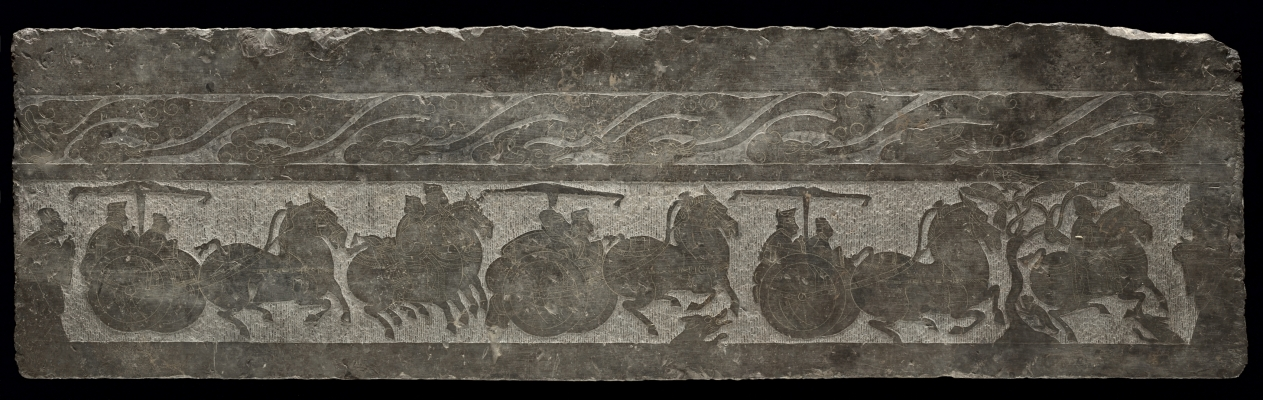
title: Frieze Fragment with Chariot Procession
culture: China, style of Wu Family Shrines, Jiaxiang district, Shandong province, Eastern Han dynasty (25–220 CE)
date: 100s CE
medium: stone carved in low relief with engraved detail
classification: Sculpture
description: The frieze shows a procession of horse-drawn chariots passing through terrain animated with wild animals and a monkey climbing a tree. The border of swirling clouds above conveys associations with heaven or the remote land of immortals in the high mountains. Comparable in style with the stone reliefs of the Wu Family shrines, this stone may have been originally carved for a local Eastern Han dynasty family tomb of similar status. To take a rubbing of the frieze, a moistened sheet of paper is laid over the slab and tamped with an ink pad that then darkens the raised areas, leaving concave sections and incised lines blank.